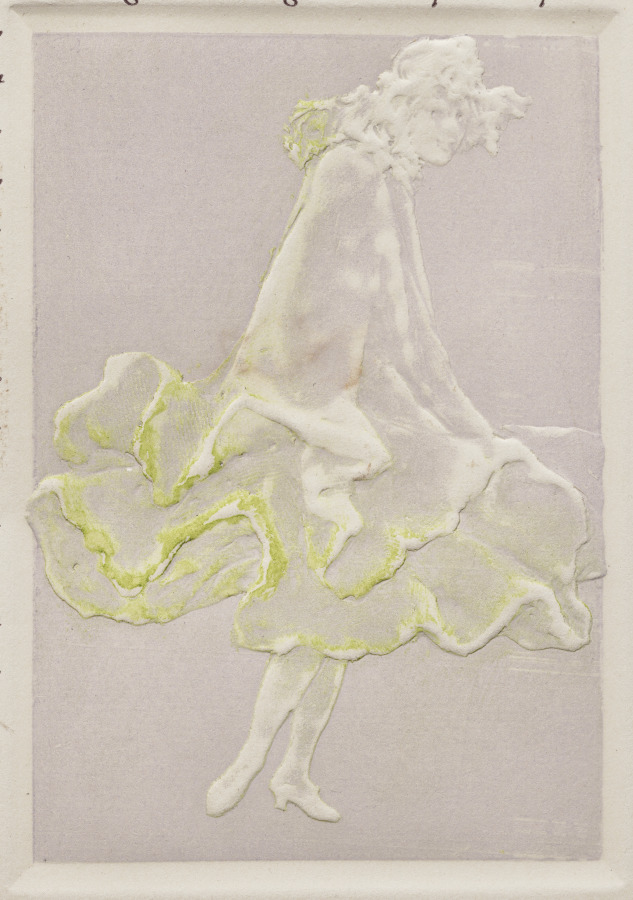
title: Dancing Woman with Arms Lowered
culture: France, early 20th Century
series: La Loïe Fuller, by Roger Marx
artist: Pierre Roche (French, 1855–1922)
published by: Les Cents Bibliophiles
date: 1904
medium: gypsograph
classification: Bound Volume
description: Although best known as a sculptor, Roche was a versatile and prolific artist who worked in many mediums. Loïe Fuller, the pioneer of modern dance who took Paris by storm in 1892, was one of his favorite subjects. He portrayed her in clay, bronze, marble, plaster, and in a series of gypsographs that illustrated an essay by the art critic Roger Marx. The book was described as "a precious monument to Loïe Fuller."